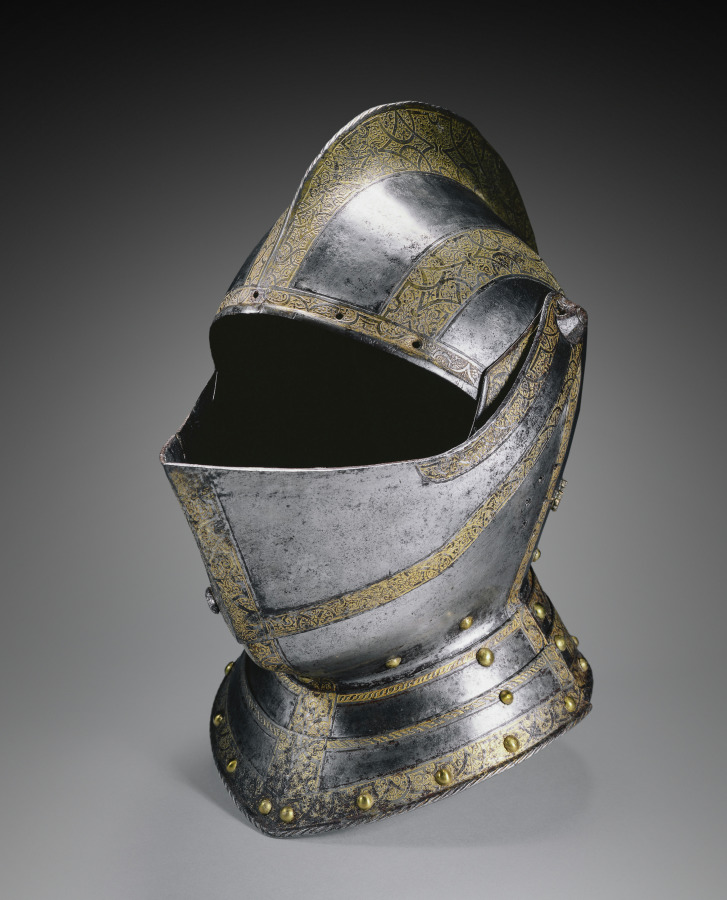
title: Close Helmet (from a Small Garniture, perhaps for Siegmund Friedrich, Freiherr von Herbertstein [d.1621])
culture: Germany, Augsburg (?), 16th century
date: c. 1580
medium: steel, etched and gilded, brass rivets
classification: Arms and Armor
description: This helmet appears to belong to a garniture for man and horse of which other elements survive in the Higgins Armory Museum, Worcester, Massachusetts, and the Philadelphia Museum of Art. The associated visor has been removed to better show the beautiful etched and gilded strapwork decoration.